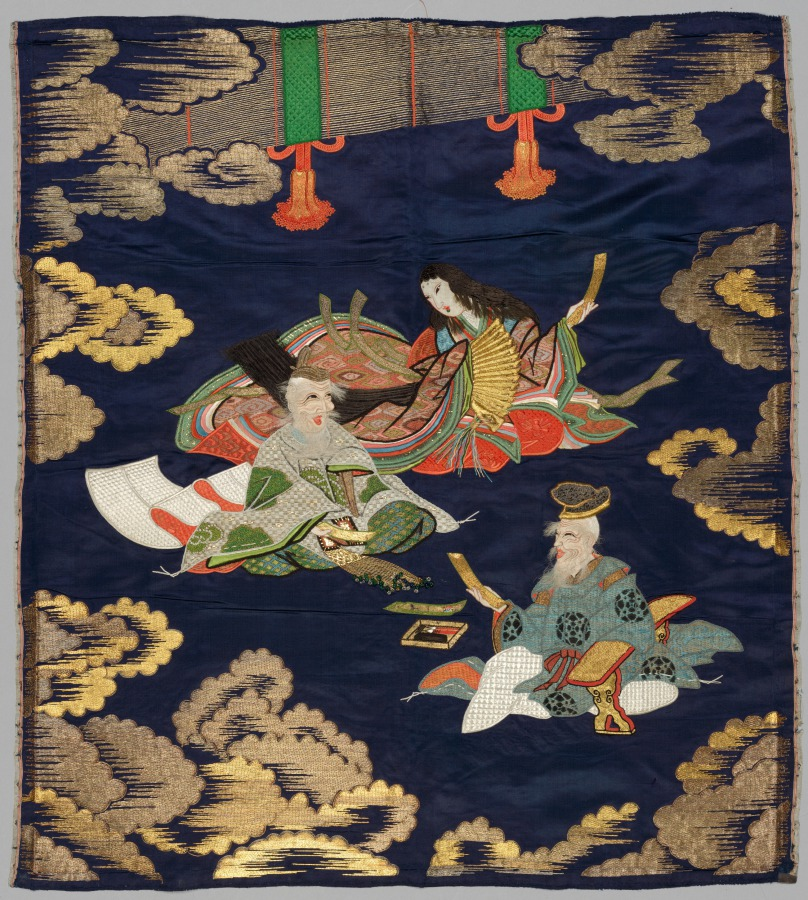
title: Embroidered Fukusa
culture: Japan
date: late 1800s-early 1900s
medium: embroidered silk with metal thread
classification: Embroidery